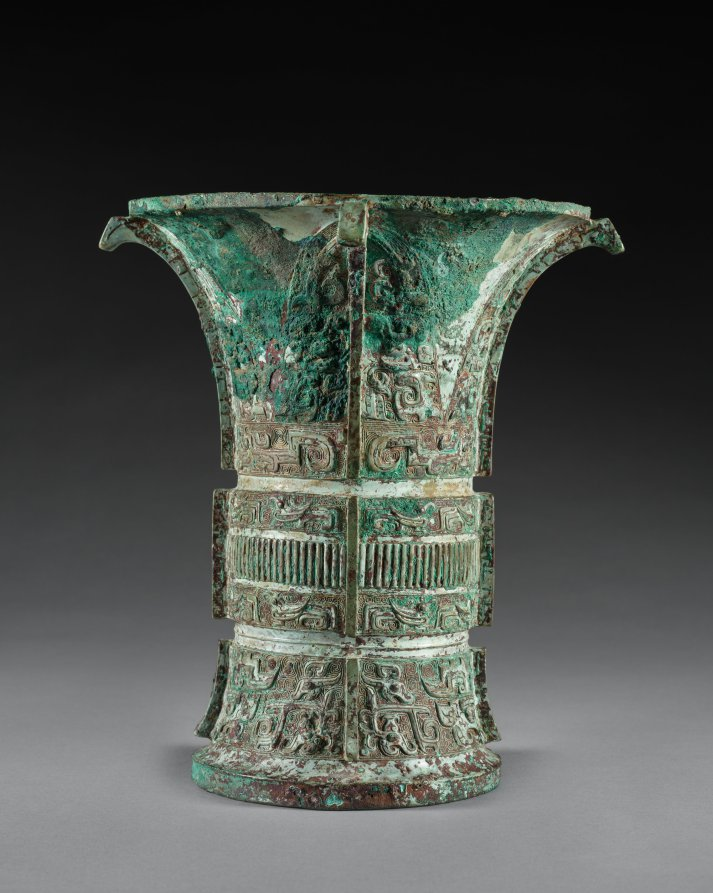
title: Wine Vessel (Fu Wu Zun)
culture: China, Western Zhou dynasty (c. 1046–771 BCE)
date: c. 1000–900 BCE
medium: bronze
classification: Metalwork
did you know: This vessel is decorated with dragons and taotie, a stylized monster face motif frequently found on ancient Chinese ritual bronzes.